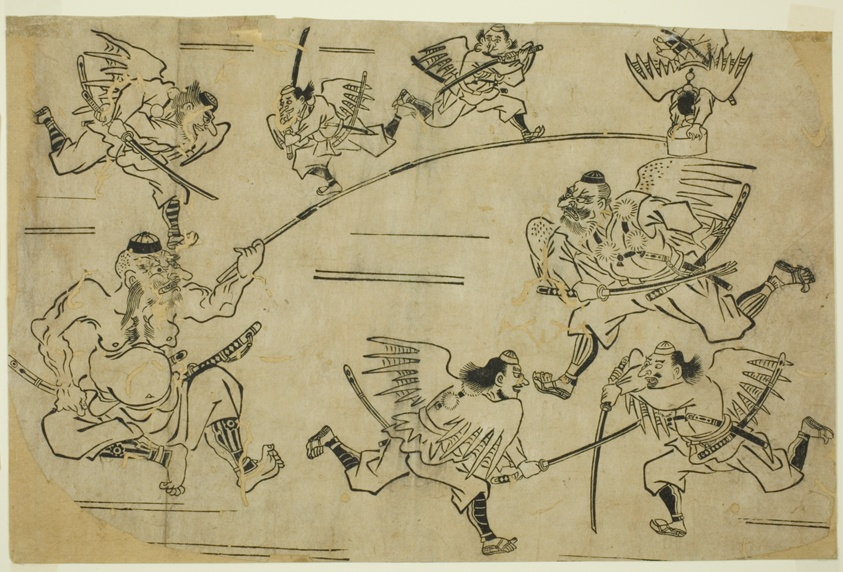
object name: Print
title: The Tengu King Training his Pupils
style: Japanese (culture or style)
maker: Attributed to Hishikawa Moronobu; Japanese, (?)-1694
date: c. 1690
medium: Woodblock print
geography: Japan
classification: woodblock print; print; asian art; woodblock